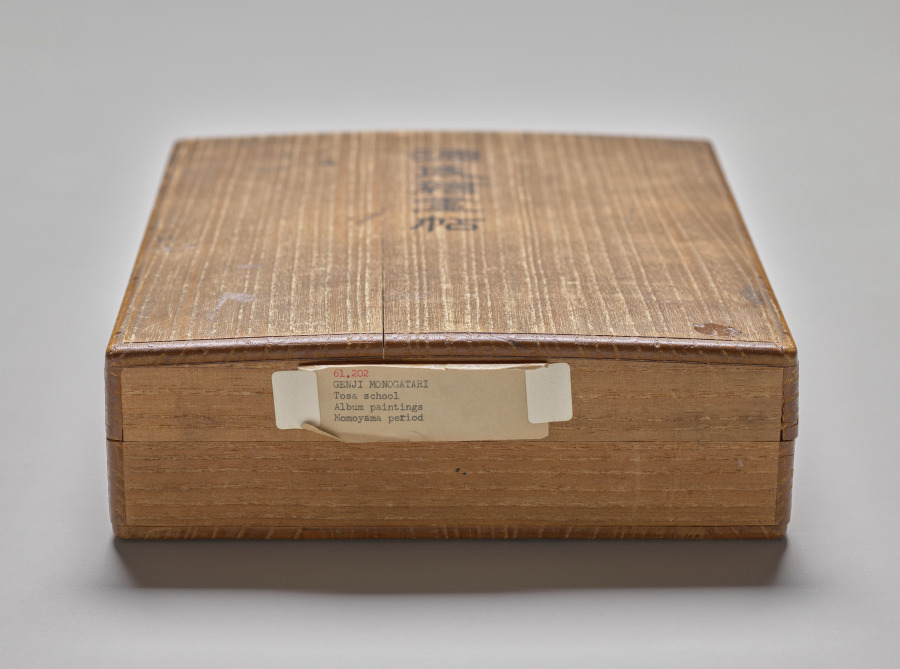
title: Album of Illustrations for the Tale of Genji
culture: Japan, Edo period (1615–1868)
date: 1600s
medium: Double-sided accordion-style album of 17 leaves; ink, light color, and gold on paper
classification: Bound Volume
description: This album contains illustrations for the classic literary work the Tale of Genji, authored in the 1000s by Murasaki Shikibu, an aristocrat of the Heian period (794–1185) court. The scenes are painted in the “white drawing” (hakubyō) mode, in which a fine ink line is used to depict figures and spaces with great subtlety, punctuated only occasionally by traces of red pigment for a character’s lips, a detail of a garment, or a decorative element. These two scenes illustrate episodes from the chapters “Thin Veil of Cloud” (Usugumo) and “Barrier Gate” (Sekiya).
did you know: The illustrations are identified by chapter title in cartouches to the upper right of the paintings.